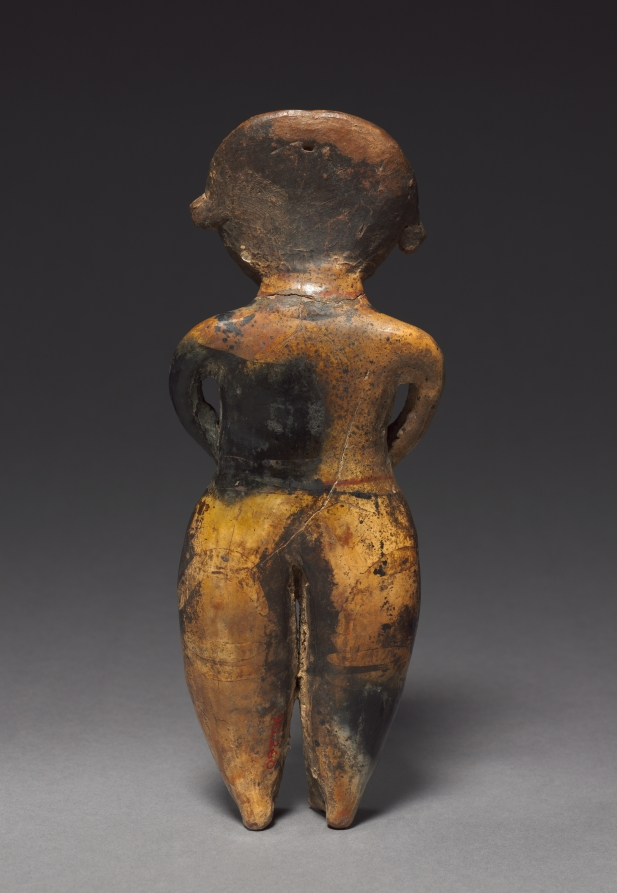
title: Standing Female Figure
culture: Mexico, Nayarit, Chinesco style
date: 100 BCE–300 CE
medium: pottery with colored slips and resist patterning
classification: Sculpture